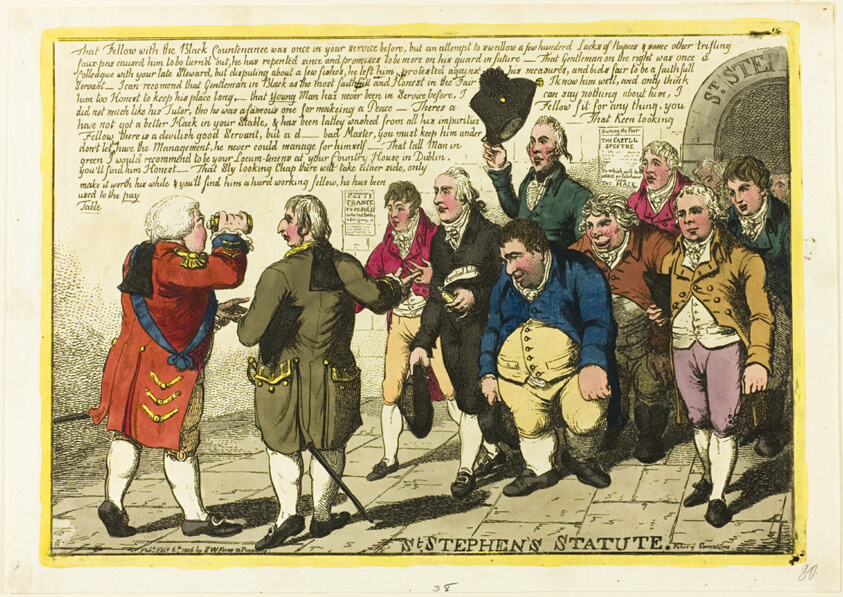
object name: Print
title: St. Stephen's Statute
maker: Charles WIlliams (English, active 1797-1830); published by S. W. Fores (English, active 1785-1825)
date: published February 6, 1806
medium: Hand-colored etching on ivory laid paper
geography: England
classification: etching; print; prints and drawing